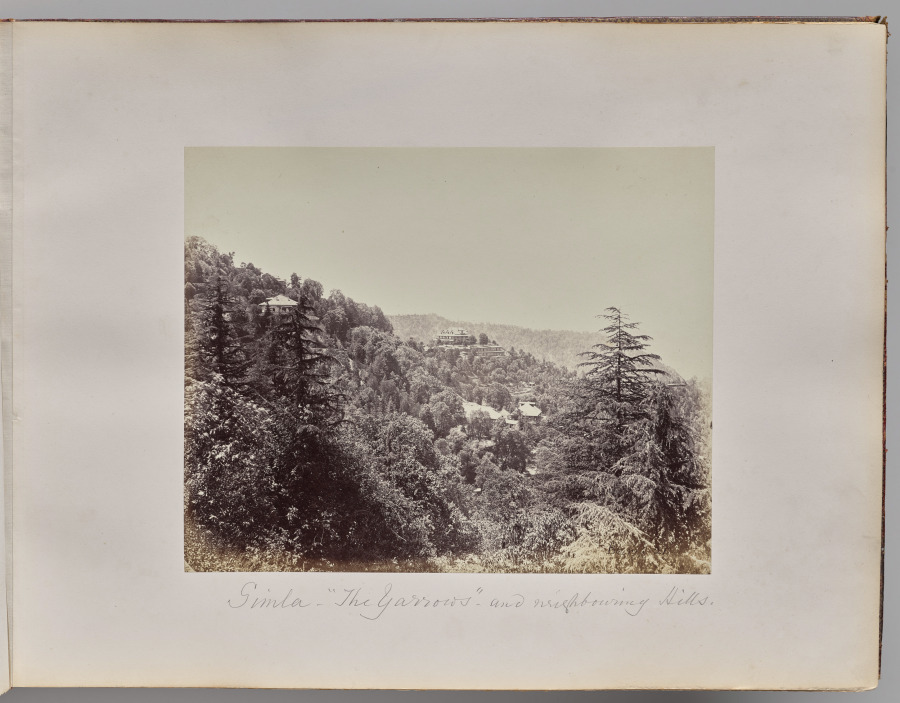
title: Shimla. The Yarrows and Neighboring Hills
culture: England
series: Photographs of Northern India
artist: Samuel Bourne (British, 1834–1912)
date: 1863–70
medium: albumen print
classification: Photograph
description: The 50 images in this album, all taken in the 1860s, move from the hill towns of the Himalayas down to cities including Lahore (now in Pakistan), Delhi, Lucknow, Agra, Benares (now Varansi), and Calcutta (now Kolkata). Architectural studies of major monuments offer valuable historical records of what sites such as the Taj Mahal and the imperial mosque of the Mughal emperors in Delhi looked like before twentieth-century restorations.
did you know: Samuel Bourne, the author of most the images in this album, was a banker in England before he moved to India to become a professional photographer.